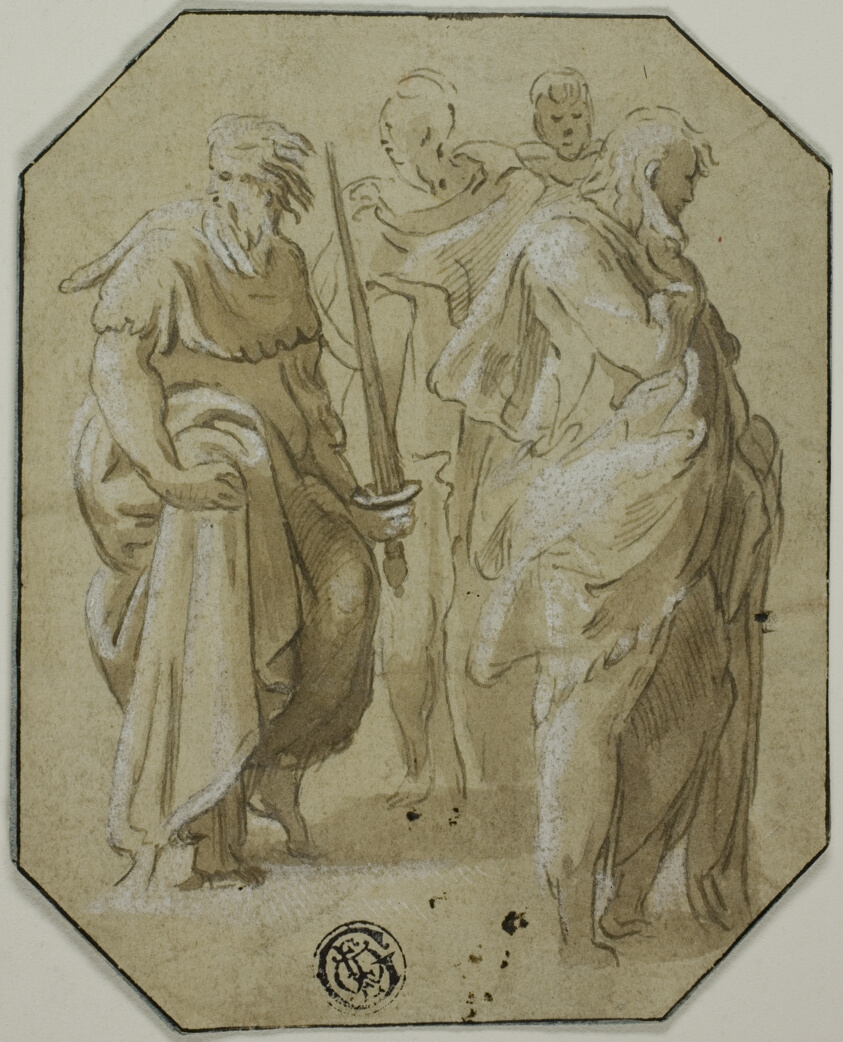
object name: Drawing and Watercolor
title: Saint Paul and Three Other Standing Figures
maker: Attributed to Count Antonio Maria Zanetti the Elder (Italian, 1679-1767); after Francesco Mazzola, called Il Parmigianino (Italian, 1503-1540)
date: 18th century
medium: Pen and brown ink, with brush and brown wash, heightened with white gouache, over traces of graphite, on cream laid paper, laid down on blue laid paper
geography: Italy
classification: ink with wash; drawings (visual works); prints and drawing